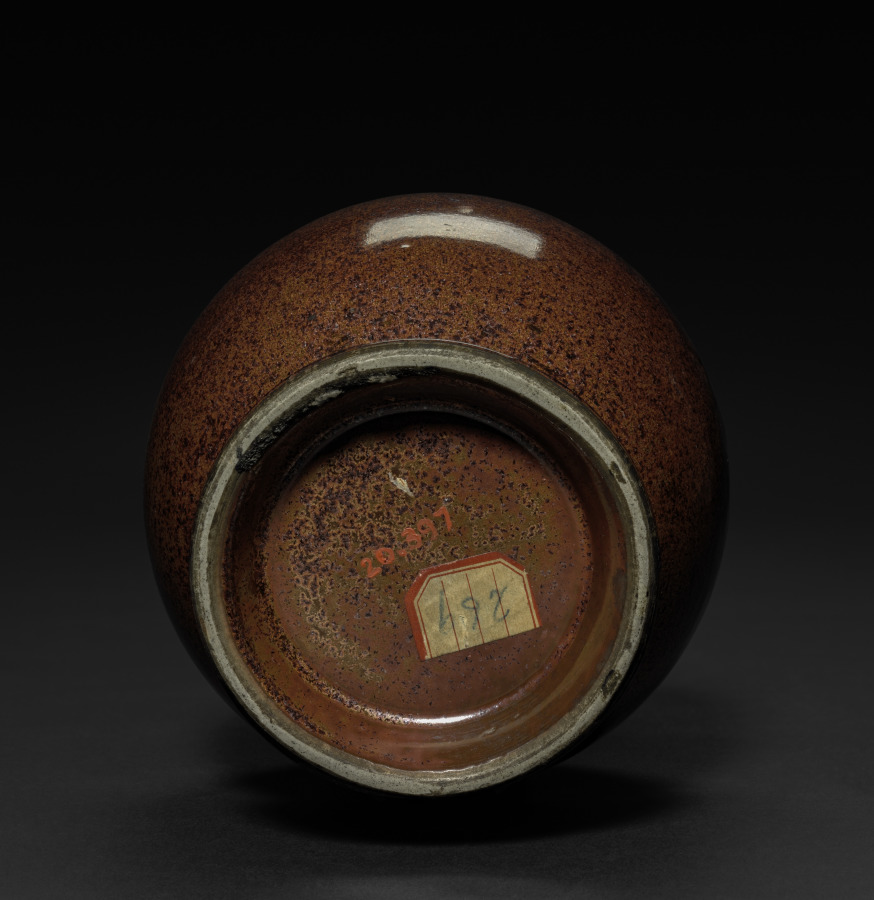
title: Vase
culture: China, Qing dynasty (1644–1911), Qianlong reign (1736–95)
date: 1736–95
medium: porcelain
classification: Ceramic